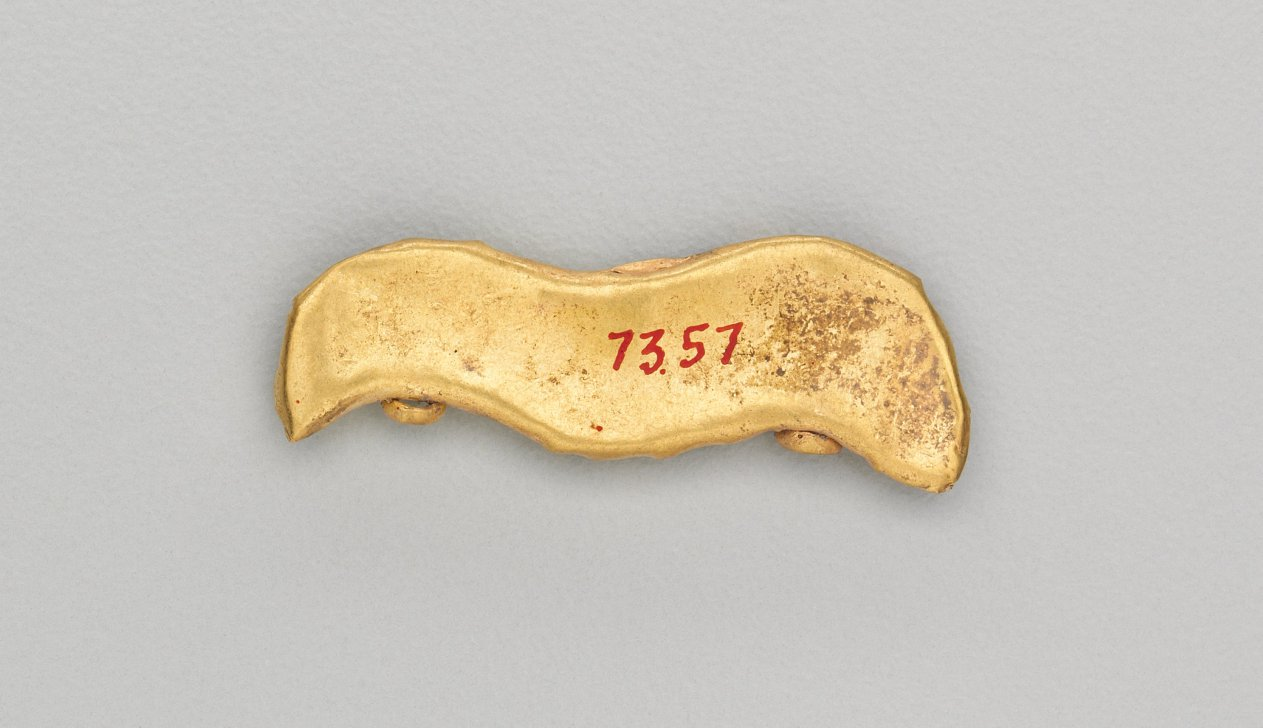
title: Set of Pendants Ending in a Bull's Head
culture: India, Shunga period (185–78 BCE)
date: 185–72 BCE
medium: gold repoussé with granulation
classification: Jewelry